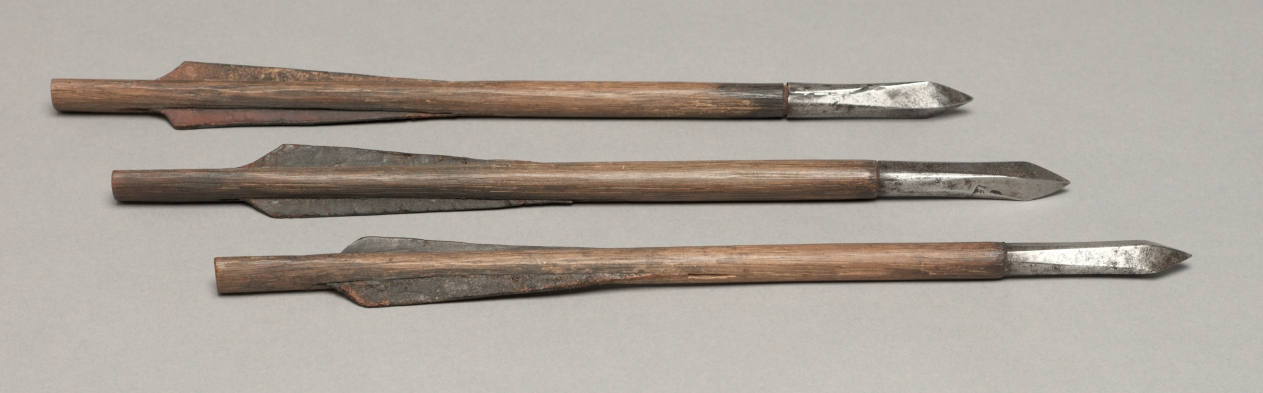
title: Crossbow Bolt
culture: Germany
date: 1500s–1600s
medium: wood, leather, steel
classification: Arms and Armor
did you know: Bolts with leather feathering were used mainly in the Tyrolean area, which includes northern Italy and western Austria.